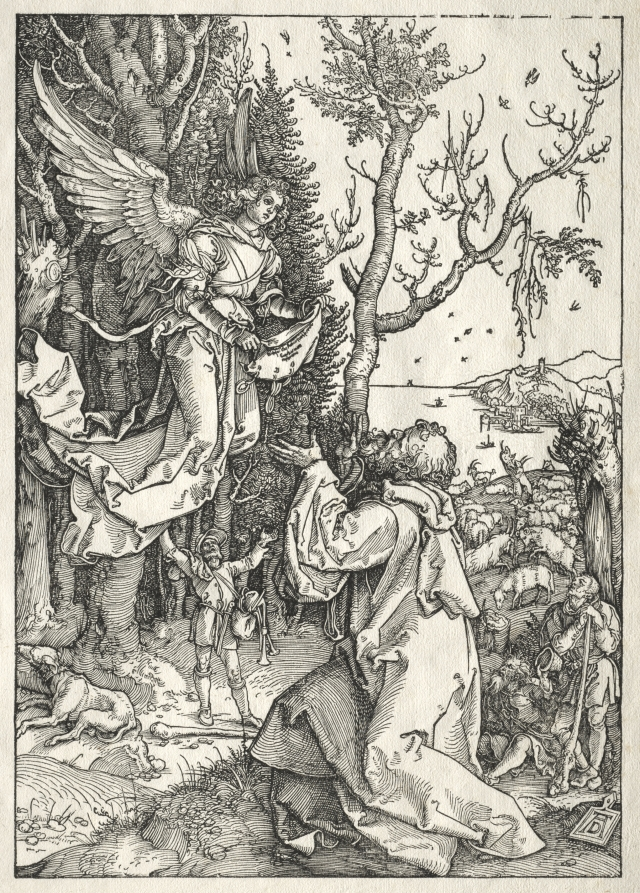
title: Life of the Virgin: Joachim and the Angel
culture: Germany, early 16th Century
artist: Albrecht Dürer (German, 1471–1528)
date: c. 1504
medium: woodcut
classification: Print